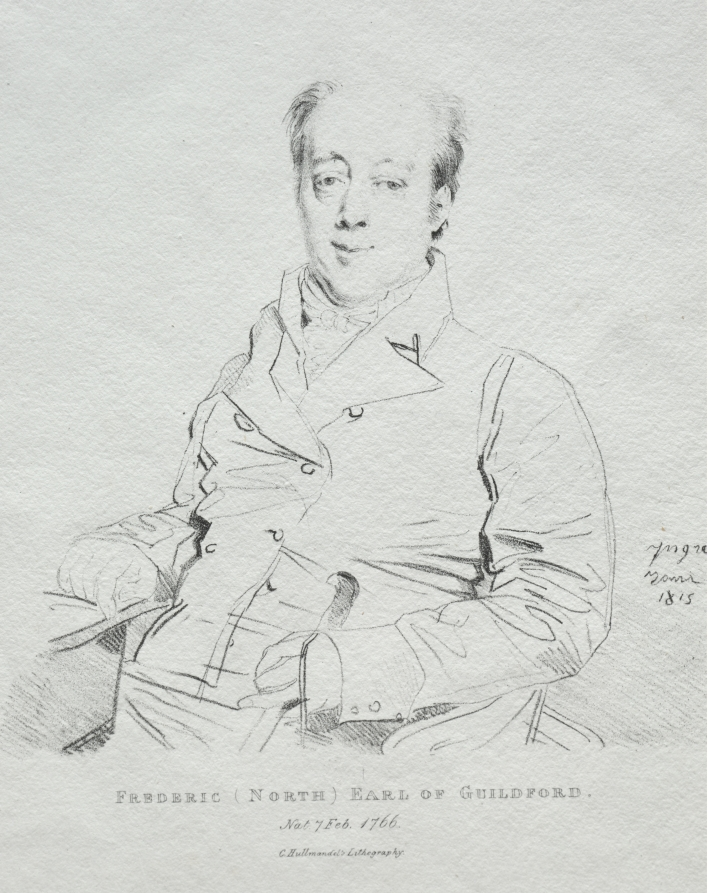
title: Frederic 5th Earl of Guilford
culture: France, 19th century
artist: Jean-Auguste-Dominique Ingres (French, 1780–1867)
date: 1815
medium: lithograph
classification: Print